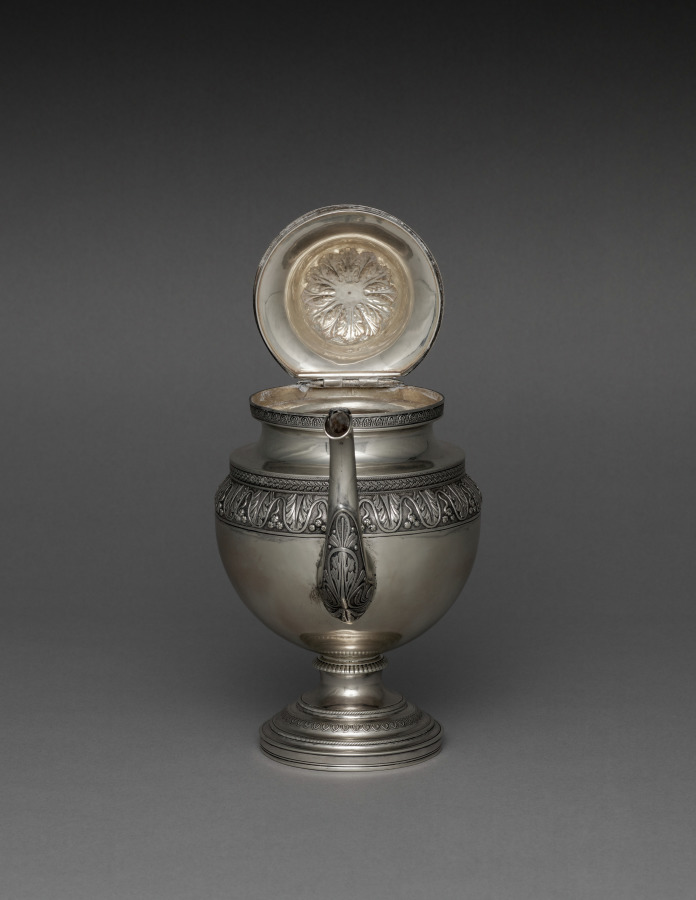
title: Covered Pot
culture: America, Pennsylvania, Philadelphia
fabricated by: after a design by Harvey Lewis (American, 1835)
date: c. 1811–25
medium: silver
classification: Silver